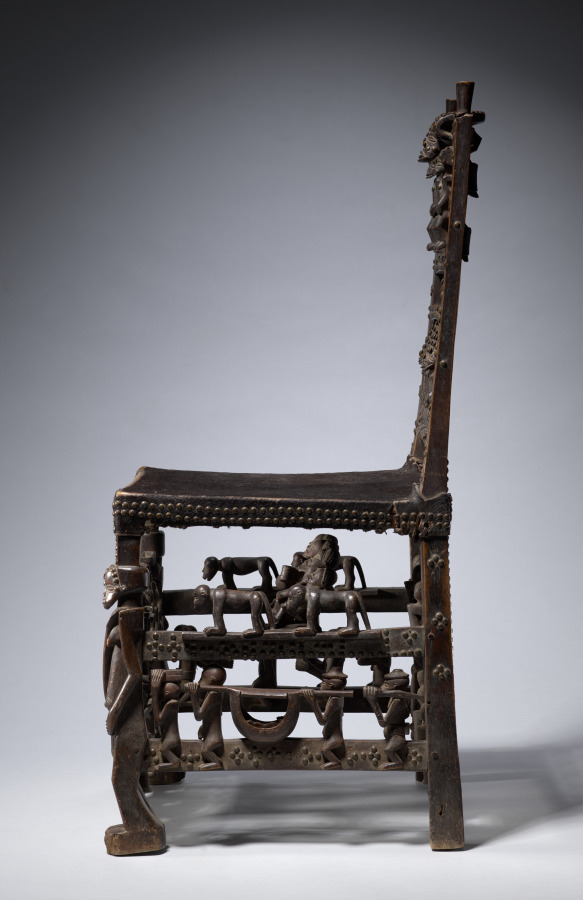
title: Ceremonial Chair or Throne (citwamo ca mangu)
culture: Africa, Central Africa, Angola, Chokwe-style carver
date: 1800s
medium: Wood, upholstery studs, leather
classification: Furniture and woodwork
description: This citwamo ca mangu chair bears over 40 sculpted figures arranged in complex compositions across the chair’s top rail (back), stretchers (rungs), and legs; all symbolize the power of Chokwe supreme chiefs. Such chairs typically bear a dozen or fewer figures. Scenes of royal life and power wrap around the seat, reinforcing how the chief and his family are at the center of their polity and its business.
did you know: Starting around the 1500s, Chokwe and other African leaders and traders received fine chairs as gifts from Portuguese traders. Chokwe leaders adapted this symbol of power as their own, using it in tandem with stools, an earlier kind of prestige seat.